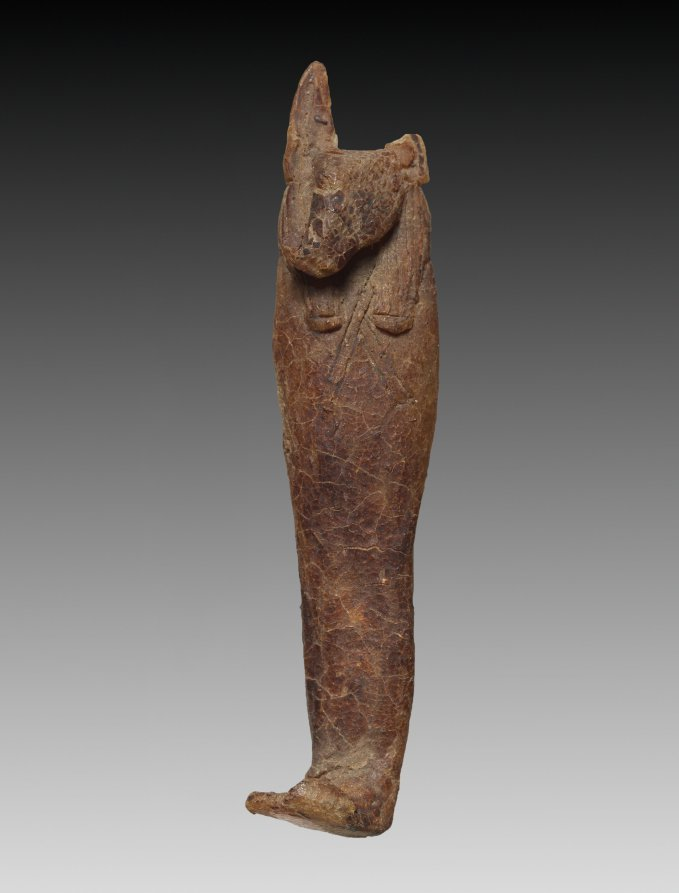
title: Son of Horus: Duamutef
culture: Egypt, Third Intermediate (1069–715 BCE), Dynasties 21–22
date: 1000–900 BCE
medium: wax with dark amber varnish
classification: Funerary Equipment